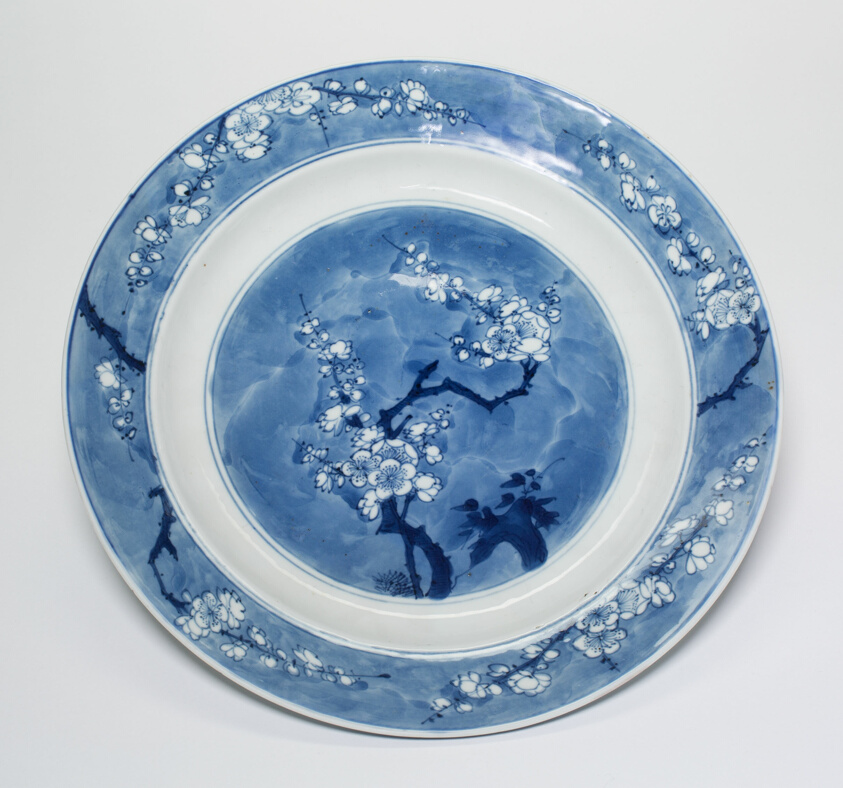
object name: Vessel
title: Dish with Plum Flowers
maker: China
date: Qing dynasty (1644–1911), Kangxi period (1662– 1722)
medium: Porcelain painted in underglaze blue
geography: China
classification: porcelain; asian art; ceramics